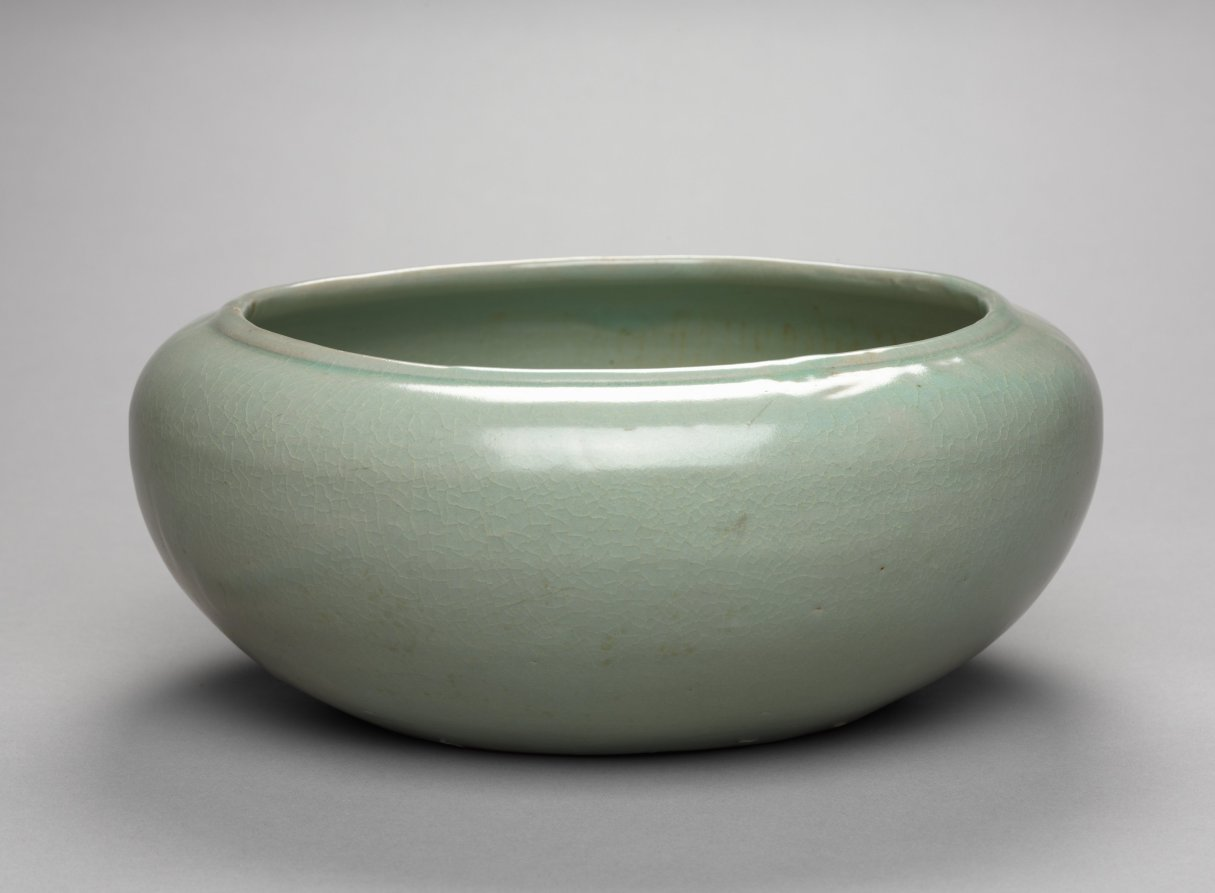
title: Bowl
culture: Korea, Goryeo dynasty (918–1392)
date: 1100s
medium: celadon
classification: Ceramic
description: As early as the seventh century, the practice of drinking tea became an important part of elite culture in Korea. In enjoying teas, elites commissioned a variety of types of utensils and vessels including this large bowl, not only to make their tea-drinking experience more exciting, but also to show their refined taste.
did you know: The distinctive bluish and greenish glaze of Goryeo celadons, shown in this bowl, is the result of distinctive small and long Korean kilns, which maintained a low oxygen saturation with a high level of carbon dioxide.